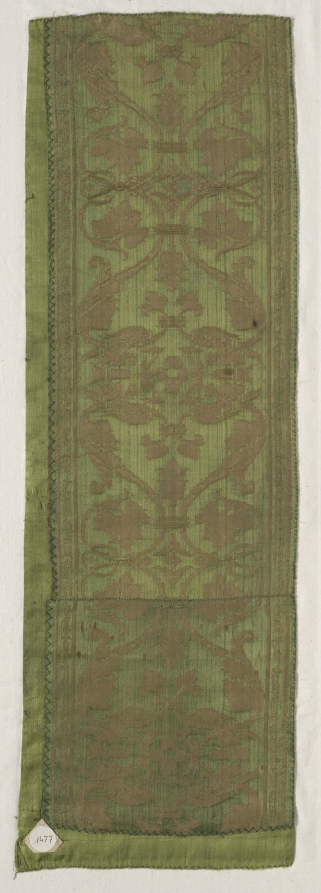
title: Silk Fragment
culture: Spain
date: 1500s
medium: damask: silk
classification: Textile